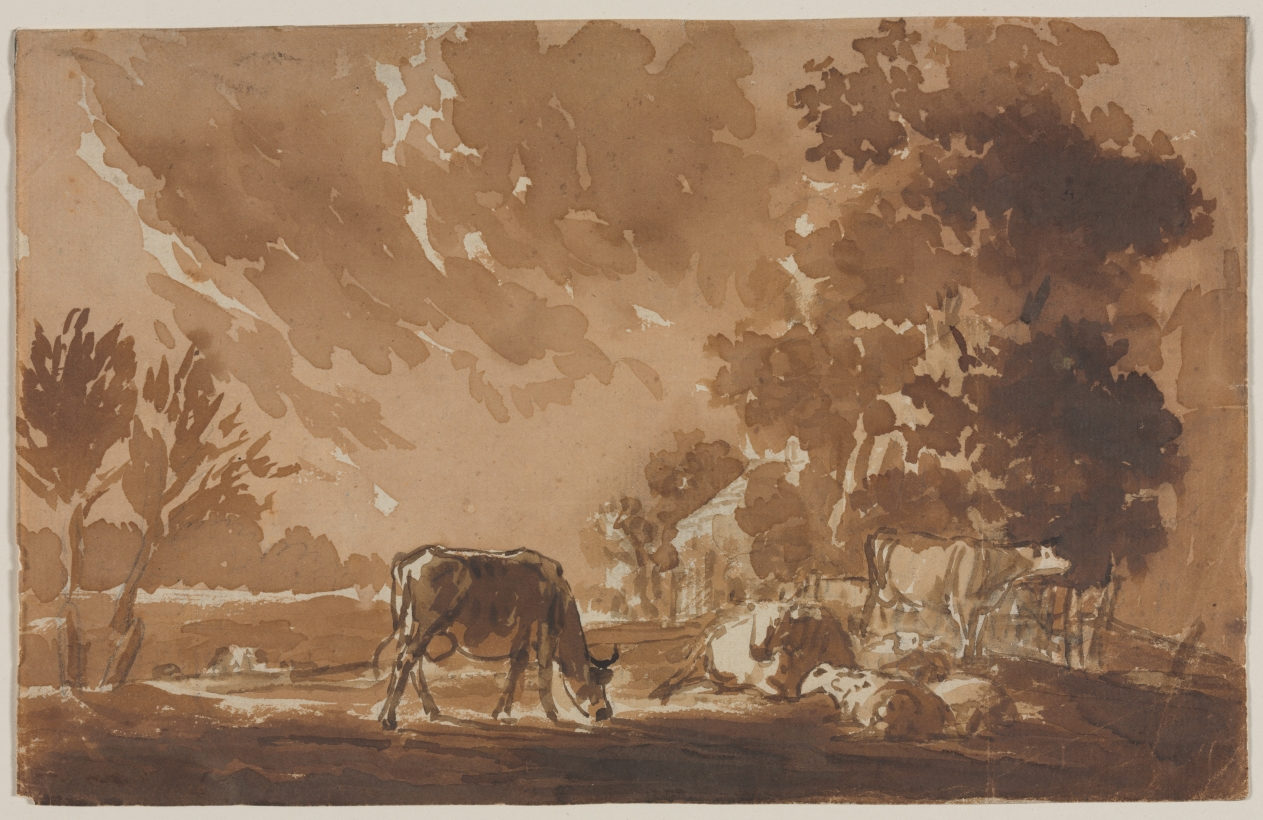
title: Landscape with Cattle (recto)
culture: France, 19th century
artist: Jules Dupré (French, 1811–1889)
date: mid- to late 1800s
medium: brush and brown wash over graphite; framing lines in graphite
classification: Drawing